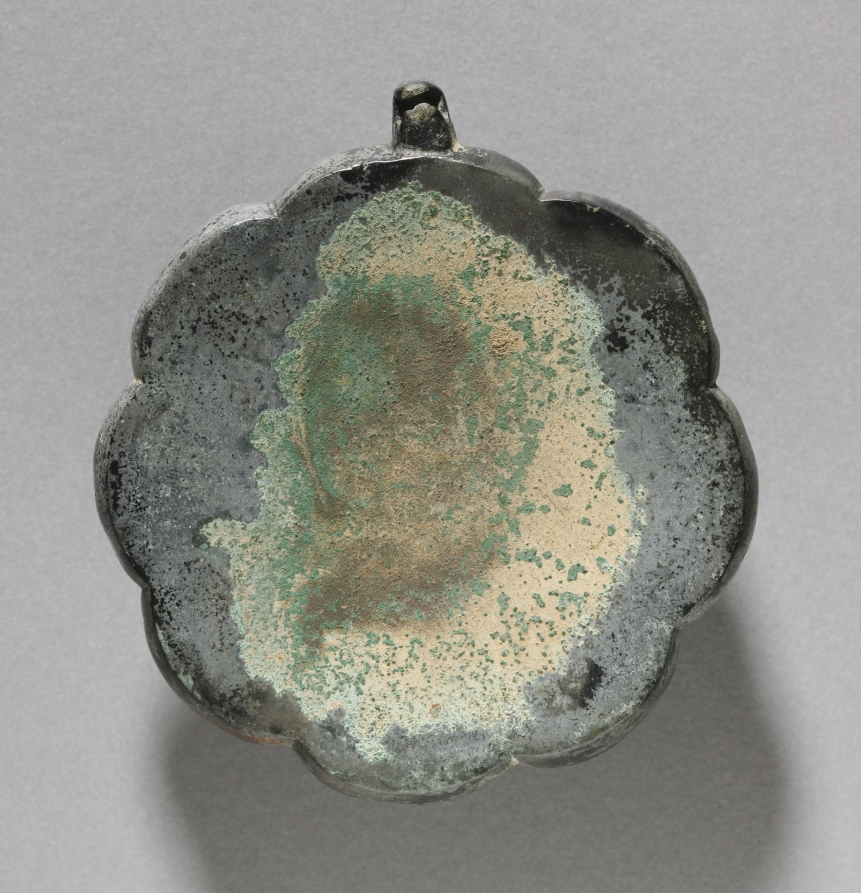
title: Flower-shaped Mirror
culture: Korea, Goryeo dynasty (918–1392)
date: 1100s-1200s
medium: bronze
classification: Metalwork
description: From ancient times, a mirror assumed various roles; a ritualistic tool, a diplomatic gift, and a luxury commodity. During the Goryeo dynasty (918-1392), which saw the great advancement of metallurgy, the royal court was the center of distributing sophisticated bronze artifacts. According to historical records, on the 7th day of the Lunar New Year, the king bestowed a bronze mirror inscribed with auspicious symbols upon each court official as part of a ceremony to celebrate the Day of Humans. This explains why a large quantity of bronze mirrors were excavated from elite tombs.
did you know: Due to its origin as an important tool in religion and politics, mirrors are often mentioned in many Korean proverbs that warn certain behaviors.